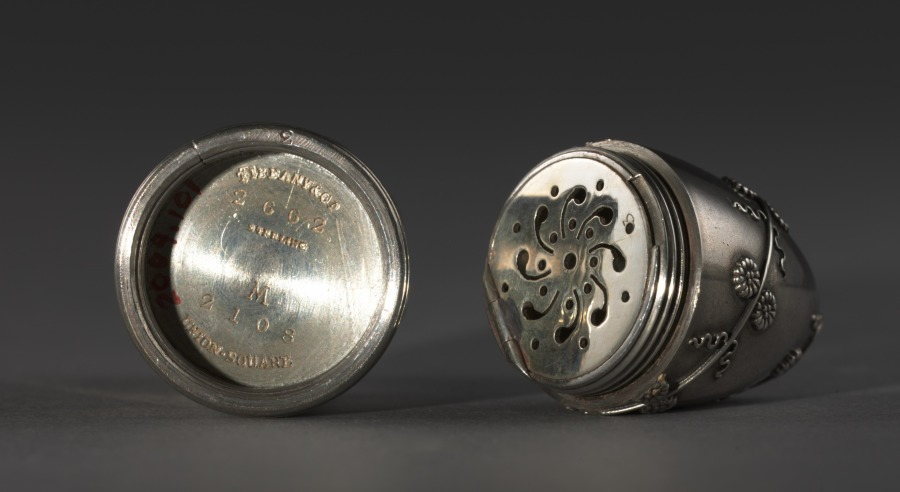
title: Scent Bottle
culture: America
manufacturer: Tiffany & Co. (America, New York, est. 1837)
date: c. 1860–70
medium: silver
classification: Silver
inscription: Inside mark: Tiffany & Co. 2662 (...) - this is too small to read M2108 Union Square